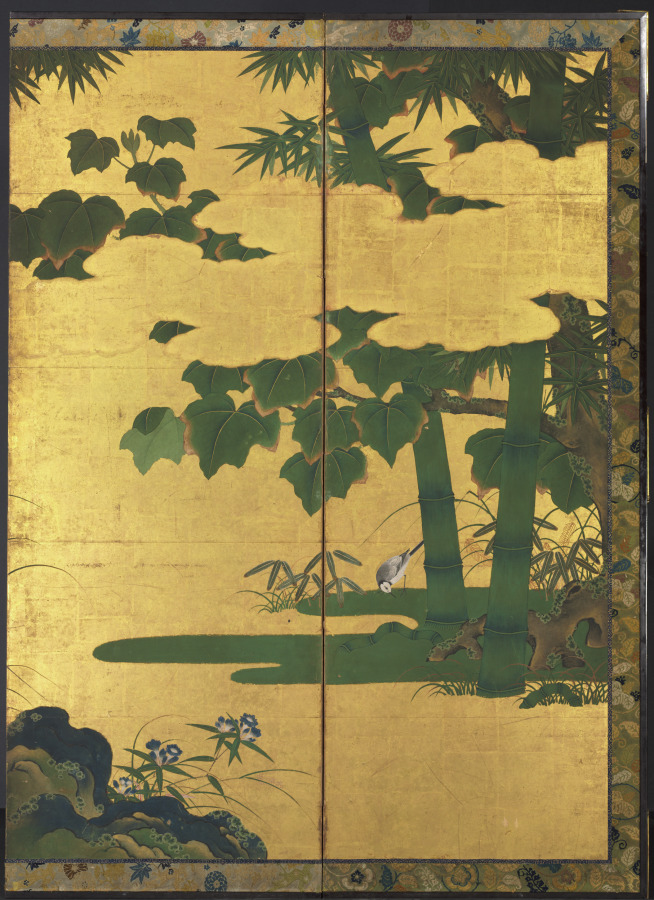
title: Peacocks and Bamboo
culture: Japan, Momoyama period (1573–1615)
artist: attributed to Tosa Mitsuyoshi (Japanese, 1539–1613)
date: late 1500s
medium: One of a pair of six-panel screens; ink, color, and gold on gilded paper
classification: Painting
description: The immense heraldic birds on display in these byøbu reflect the Momoyama era's spirit of newly gained self-confidence and an affinity for grand expressive statements in painting, architecture, the textile and ceramic arts, as well as garden design. While that period preceded the arrival of prosperity, it clearly marked an extra---ordinary moment in Japanese cultural history, one frequently compared with the twelfth century of the Heian period. Through the extensive use of gold-foil backgrounds rather than the somber palette of carefully orchestrated ink tones evident in Muromachi byøbu, patrons colla-borated with artists as well as craftsmen in fostering a decidedly new look in much of Japanese painting. Here for instance there is no imaginary vista suggesting China's vast waterways and mountain ranges. The setting is composed instead of highly stylized lozenges of mineral green paint, suggesting the earth from which clumps of grass, flowering plants, and towering bamboo and paulownia trees emerge. Clusters of lumpy, blue-green rocks dotted with lichen provide stabilizing three-dimensional foils for these islands of vegetation as well as the all-encompassing flat, golden surface. The glorious artificiality of the setting precisely serves the artist's effort to compose a credible yet other-worldly vista for depicting the legendary phoenix gazing across the landscape at the pair of peacocks. Rather than an emblem of immortality, as it is in Western lore, in Japan the phoenix evolved out of its origins in Chinese mythology to become, by the sixteenth century, an auspicious symbol of political authority. Together with clusters of the distinctively shaped paulownia leaves, this long-tailed, mythical bird graced lacquerware as well as mural paintings, proclaiming an air of graceful com-mand. A characteristic infusion of temporality has been included also, through a seasonal flowering schema extending from spring to early summer (right) to fall and the advent of winter (left). Although traditionally attributed to the Tosa school master Tosa Mitsuyoshi (1539-1613), these byøbu possess neither seals nor signatures to confirm that authorship. Known for his jewel-like, modest-sized album paintings of courtly narratives such as The Tale of Genji, it is likely both studio training and contemporary fashions in patronage conspired to produce a good number of such byøbu. This example from the Momoyama era represents one such effort from a masterful Tosa painter, too little seen in Western collections.